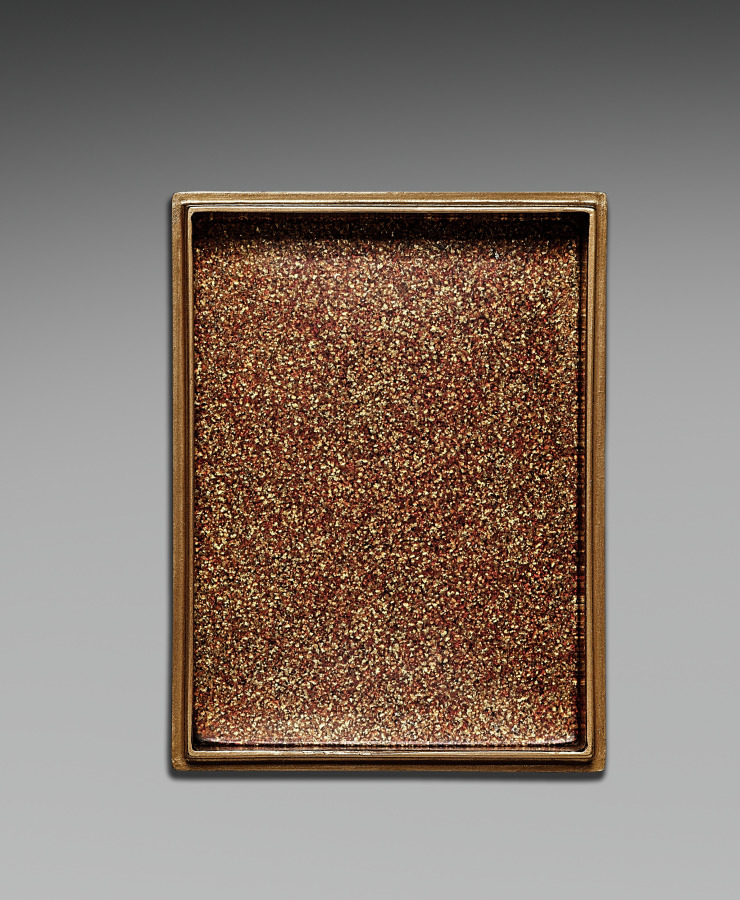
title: Nested Boxes with Chrysanthemums (inner box lid)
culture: Japan, Meiji period (1868–1912)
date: early 1900s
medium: lacquer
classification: Lacquer